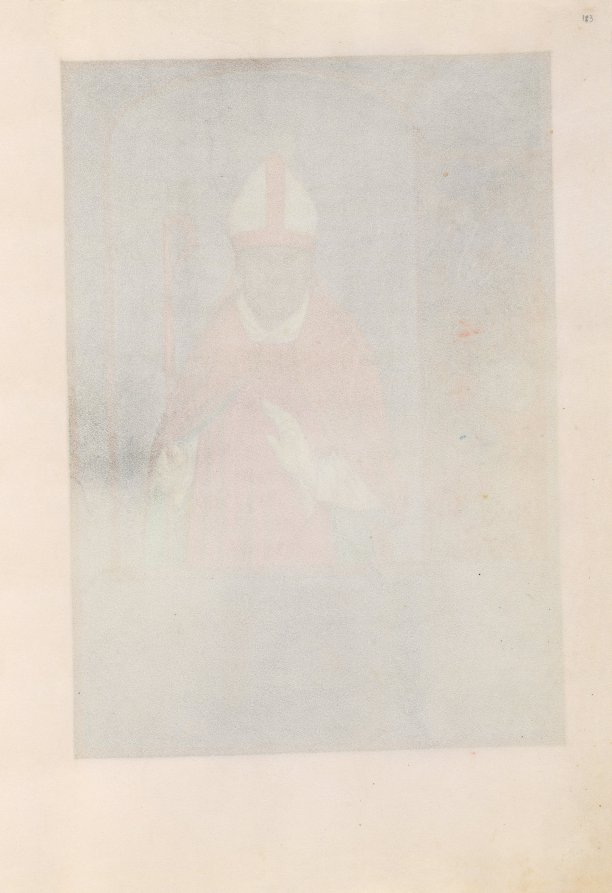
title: Hours of Queen Isabella the Catholic, Queen of Spain: Fol. 183r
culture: Flanders, Ghent and Bruges, late 15th century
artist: Master of the First Prayerbook of Maximillian (Flemish, c. 1444–1519)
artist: and Associates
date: c. 1500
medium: ink, tempera, and gold on vellum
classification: Bound Volume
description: This manuscript was illuminated by a circle of at least five highly organized manuscript painters active in the Flemish cities of Ghent and Bruges. The principal illuminator was Alexander Bening, who painted the majority of the book's miniatures. Manuscripts produced by this circle of artists are renowned for the decoration of their borders, which typically feature a rich variety of realistically-painted flowers, birds, and butterflies. This prayer book, called a book of hours, was intended not for a cleric, but for the private devotions of a lay person-in this case, Isabella the Catholic, Queen of Spain (1451-1504). Isabella's coat of arms embellishes the book's frontispiece. It is unlikely that the book was commissioned by the Queen herself; rather, she probably received it as a diplomatic gift from someone courting her patronage, perhaps Cardinal Francisco Jimenez de Cisneros. A Franciscan friar, Jimenez was dependent upon Isabella for his advancement, first to the post of Queen's confessor in 1492, and then to Archbishop of Toledo in 1495.